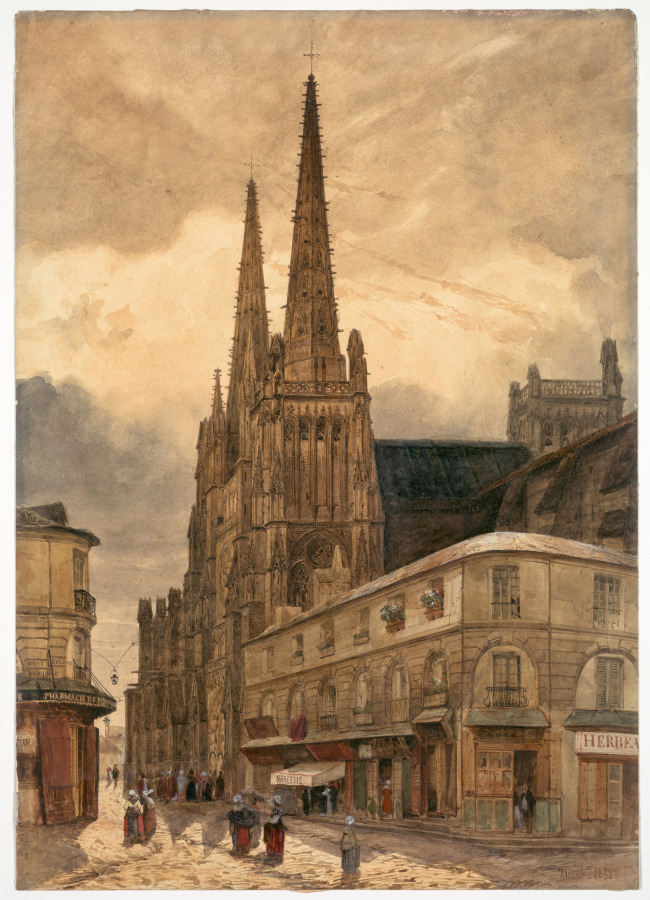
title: Cathédrale Sainte-André de Bordeaux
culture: France, 19th century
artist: Adrien Dauzats (French, 1804–1868)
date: 1832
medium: watercolor with gum arabic and touches of gouache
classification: Drawing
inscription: Recto, brown ink, lower right corner: ADauzats 1832